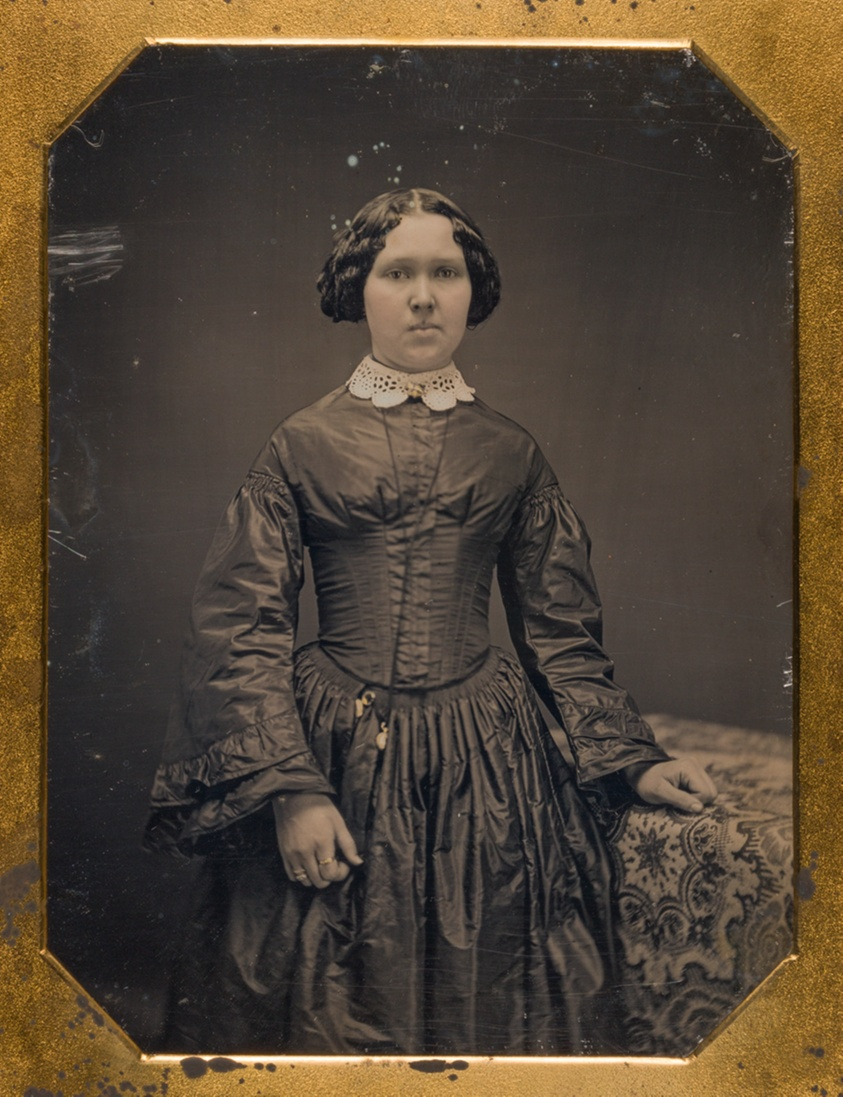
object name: Photograph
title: Untitled (Portrait of a Young Woman in a Dark Silk Dress)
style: 19th century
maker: Artist unknown; Probably American, 19th century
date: 1839/60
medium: Daguerreotype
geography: United States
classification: portrait; daguerreotype; photograph; photography; portrait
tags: portraits: female subject, portraits